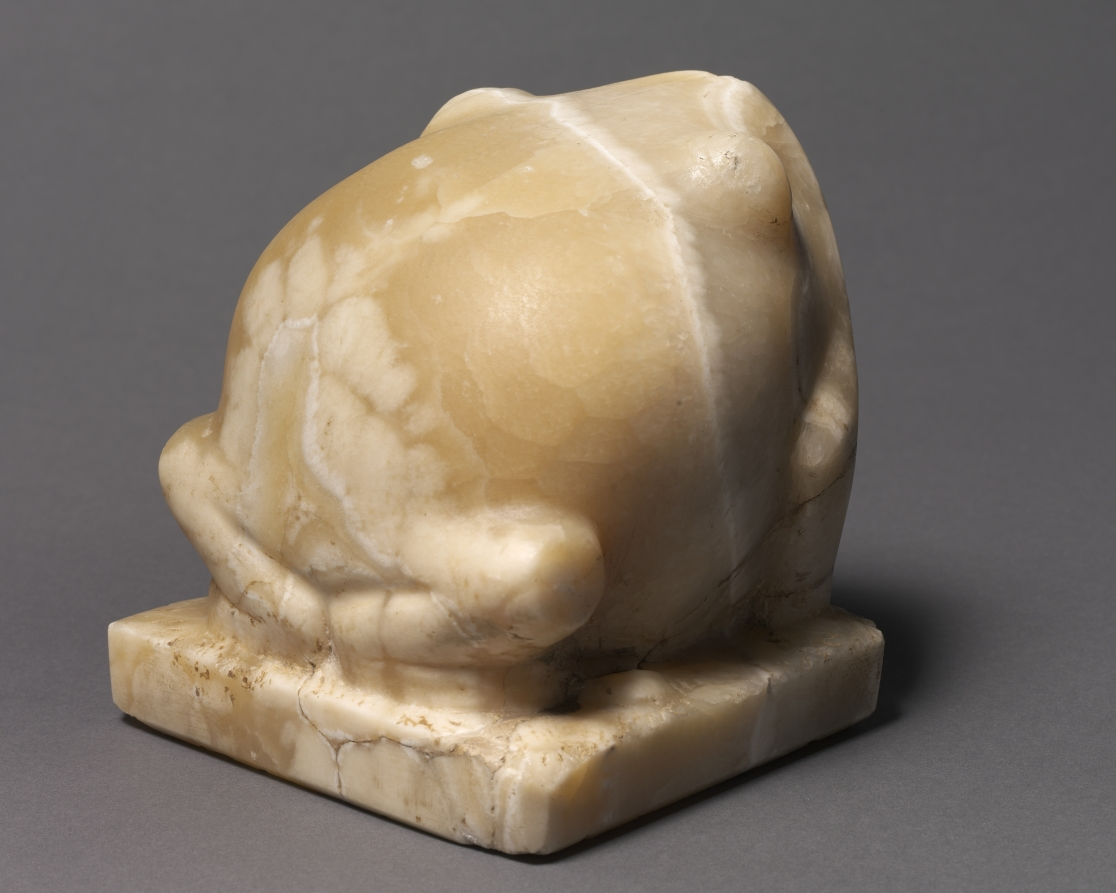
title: Statue of Heqat, the Frog Goddess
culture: Egypt, Predynastic (5000–2950 BCE), Naqada III (3200–3000 BCE)–Egypt, Early Dynastic (2950–2647 BCE), Dynasty 1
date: c. 2950 BCE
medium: travertine (Egyptian alabaster)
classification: Sculpture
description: During the Predynastic period statues of animals are much more common than those of humans. This statue of a frog stands at the beginning of a great tradition of animal sculpture in Egyptian art. The sculptor has shown great sensitivity to the natural banding of the stone, using it to enhance the roundness of the animal's form. Small frogs, mostly of faience, are among the most common votive offerings deposited at early temple sites. The frog's exact religious significance in the Predynastic period is unknown, but in later times it was most often identified with Heqat, the goddess who assisted at childbirth.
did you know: This probably represents a puffed-up Bufo viridis, one of two types of "frogs" (it is actually a toad) represented in Egyptian art.